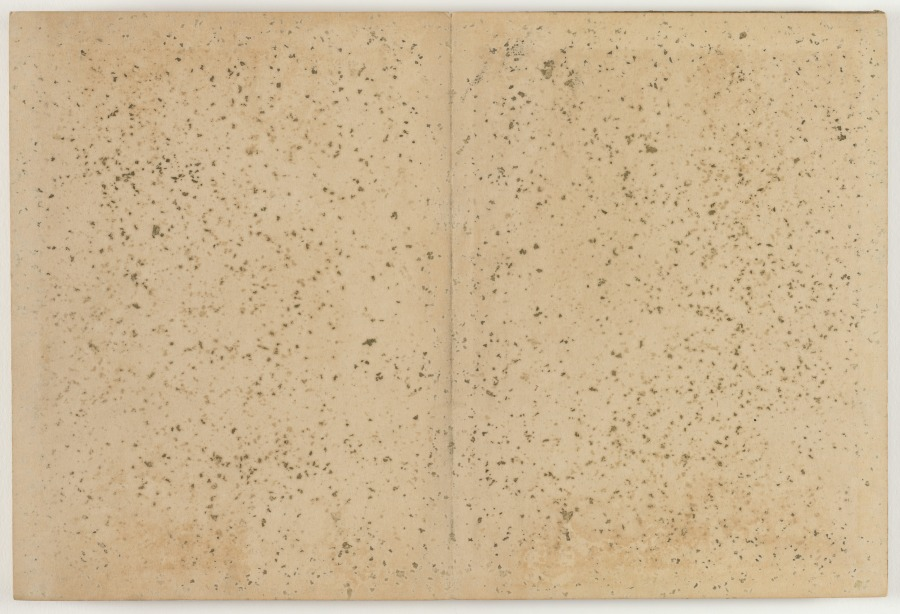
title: Flowers of a Hundred Worlds (Momoyogusa), Vol. 2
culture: Japan, Meiji period (1868–1912)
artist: Kamisaka Sekka (Japanese, 1866–1942)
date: 1909–10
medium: one of a set of three woodblock printed folding-books; ink, color, gold, and silver on paper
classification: Bound Volume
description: This volume from a set of three woodblock printed albums displays the graphic design prowess of Kamisaka Sekka. The images were first distributed one by one to subscribers to the series but later were reissued in bound form, like this book, for mass consumers. Each print features a vignette taken from nature or Japanese literature. Many of the scenes have a long history in Japan, originating in the 900s or 1000s and having been interpreted by all manner of artists since that time. Sekka’s selections hew closely to precedents from the Rinpa style originated by painter Tawaraya Sōtatsu (c. 1570–c. 1640) and calligrapher Hon’ami Kōetsu (1558–1637).